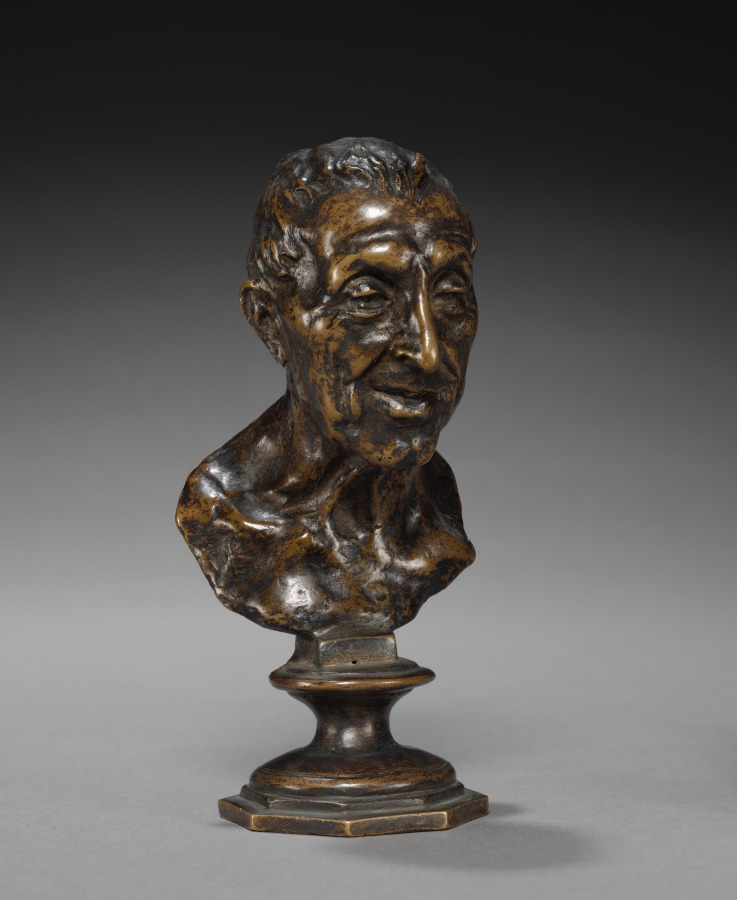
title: Head of a Man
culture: Italy, late 19th-early 20th century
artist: Vincenzo Gemito (Italian, 1852–1929)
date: c. 1875 – 1929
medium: bronze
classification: Sculpture